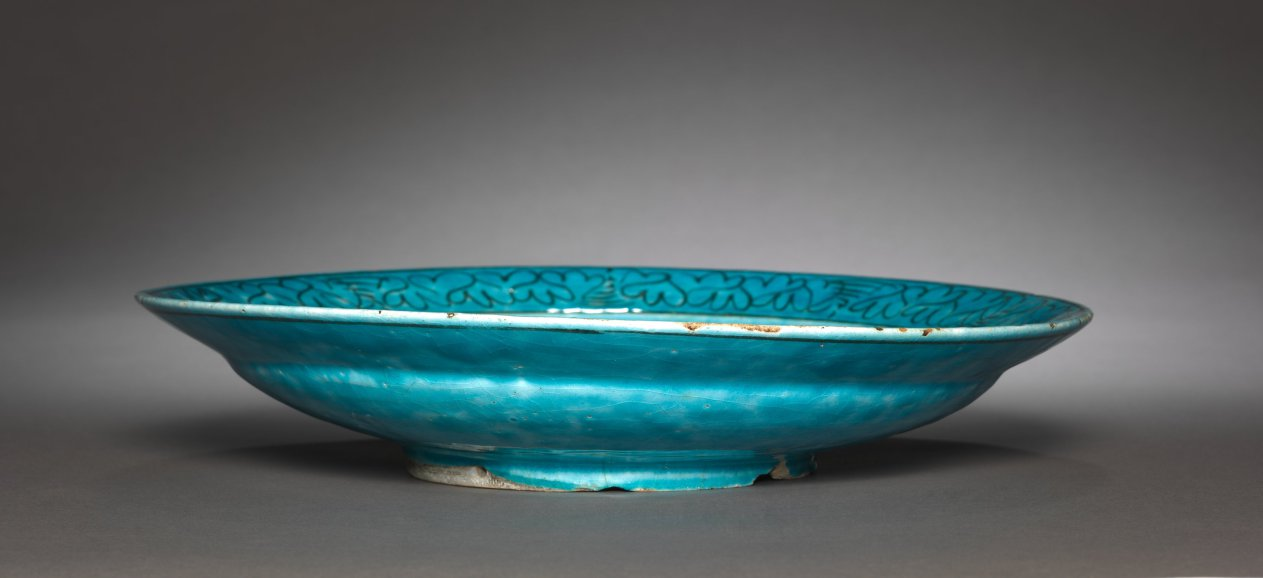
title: Dish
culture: Caucasus or northern Iran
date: c. 1600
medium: Fritware with underglaze design in black slip, Kubachi ware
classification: Ceramic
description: This type of pottery is named after a town in the Caucasus, a region between the Black and Caspian Seas that encompasses modern-day Azerbaijan, Armenia, Georgia, and parts of southern Russia, where many of these objects were found. However, it is likely that Kubachi wares were produced in northwestern Iran using fritware, a ceramic that incorporates large amounts of crushed quartz into white clay. The use of black slip to paint designs under a turquoise glaze is striking and highlights the free-flowing floral motif.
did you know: Because many of these vessels were found in peasant houses in the town of Kubachi in the Caucasus, the name "Kubachi" ware was given to the entire group.